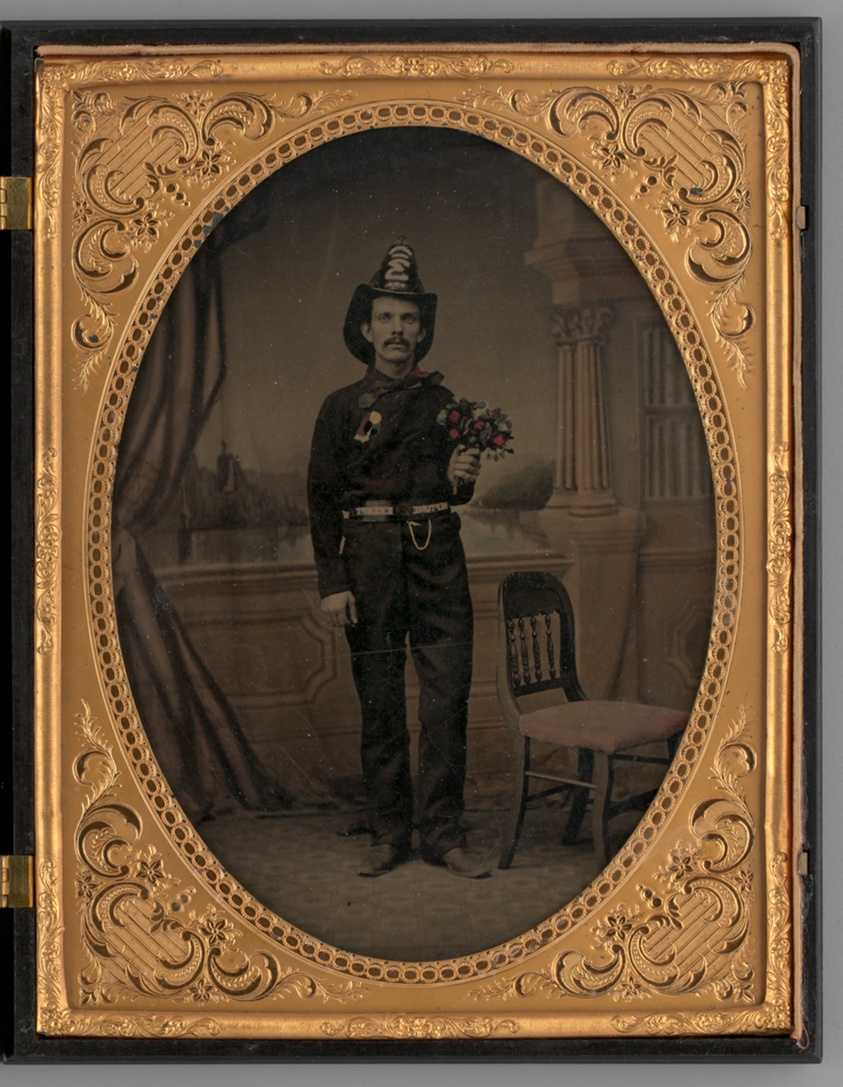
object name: Photograph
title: Untitled (Portrait of a Standing Man Wearing a Fireman's Uniform)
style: 19th century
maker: Unknown maker; American, 19th century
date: 1865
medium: Tintype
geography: United States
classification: portrait; tintype; portrait; photograph; photographic process; photography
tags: lundberg collection, uniforms, firemen, Male, men, portrait, portraits, portraits: male subject